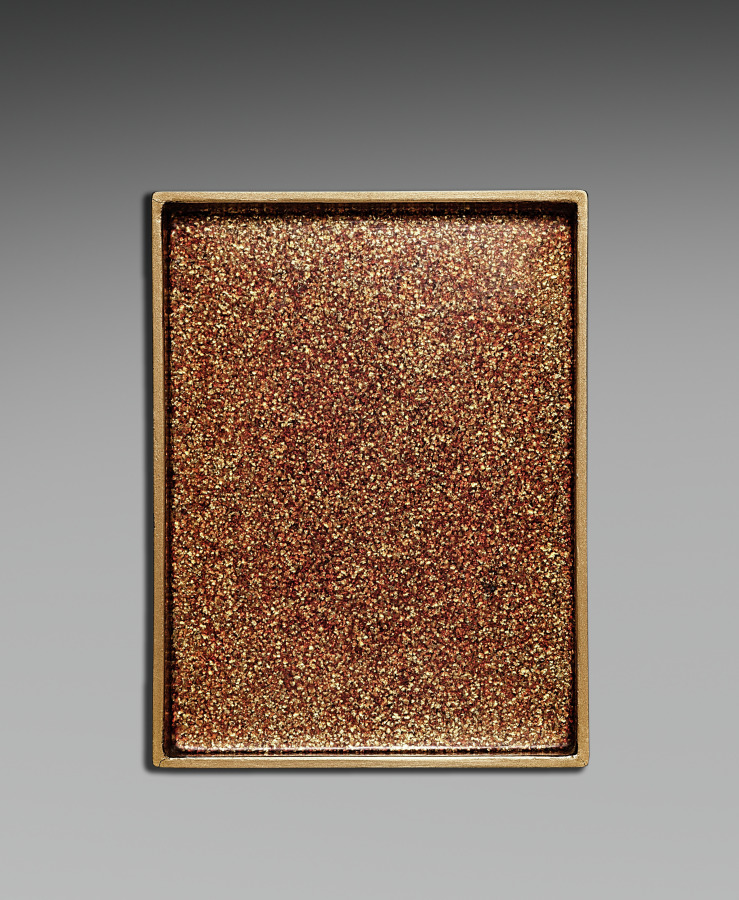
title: Nested Boxes with Chrysanthemums (inner box)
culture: Japan, Meiji period (1868–1912)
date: early 1900s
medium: lacquer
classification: Lacquer